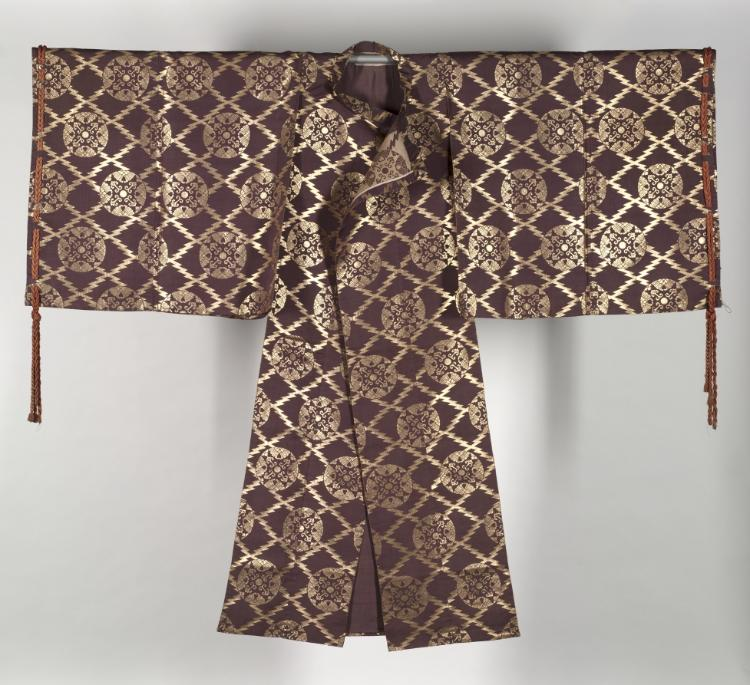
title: Noh Robe (Kariginu)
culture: Japan, Edo period (1615–1868)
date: 1800–1850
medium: silk, twill weave; metal thread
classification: Garment